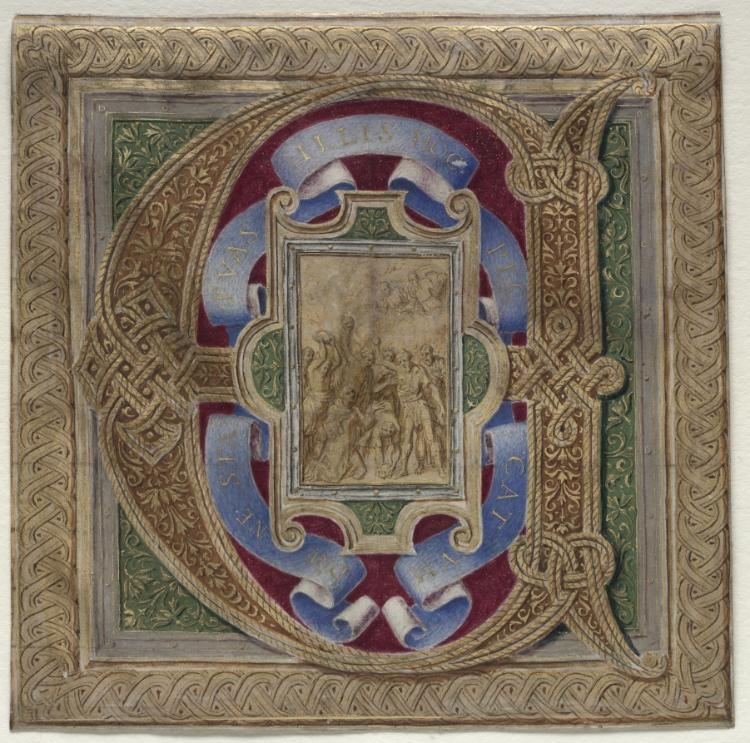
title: Historiated Initial (E) Excised from the Colonna Missal: The Martyrdom of Saint Stephen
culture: Italy, Rome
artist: Apollonio de' Bonfratelli (Italian)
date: c. 1532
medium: ink, tempera, and liquid gold on vellum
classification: Manuscript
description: This initial was once part of a manuscript missal (a service book for the altar) made for Cardinal Pompeo Colonna, probably in the year of his death. The letter E is decorated with gold arabesque and rope-work patterns evocative of Renaissance goldsmithing. At the center is a small pen-and-ink drawing representing the death of Saint Stephen, the Christian Church's first martyr. The text introduced by this initial comes from the Offertory of the Mass for the Feast of Saint Stephen (December 26), and would have read, Elegerunt Apostoli Stephanum (And they chose Stephen, a man full of faith, and the Holy Ghost). The illuminator, Apollonio de' Bonfratelli, was active at the papal court where he decorated manuscripts for Popes Pius IV and V as well as other members of the Church hieiarchy.